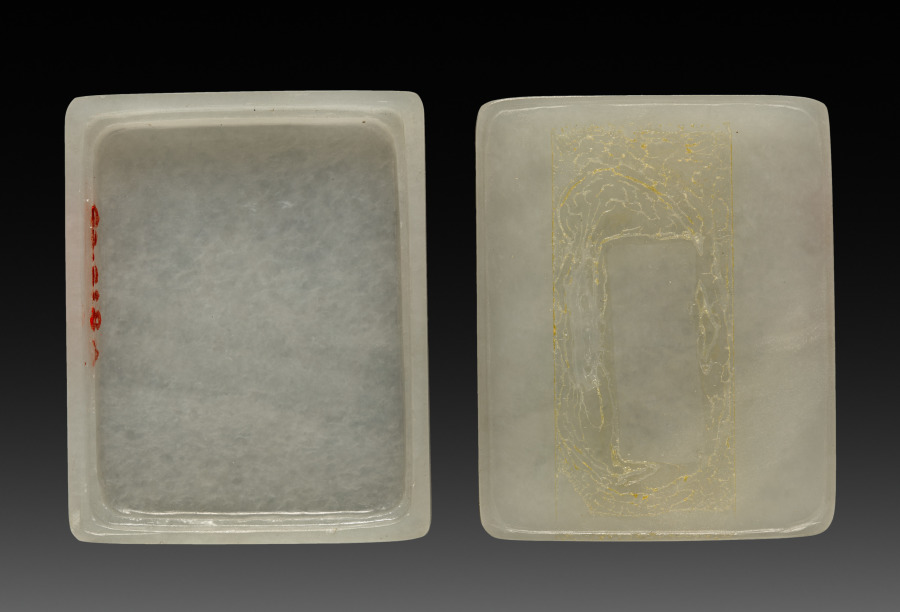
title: Seal Box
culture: China, Qing dynasty (1644-1911)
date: 1644–1700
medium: jade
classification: Jade